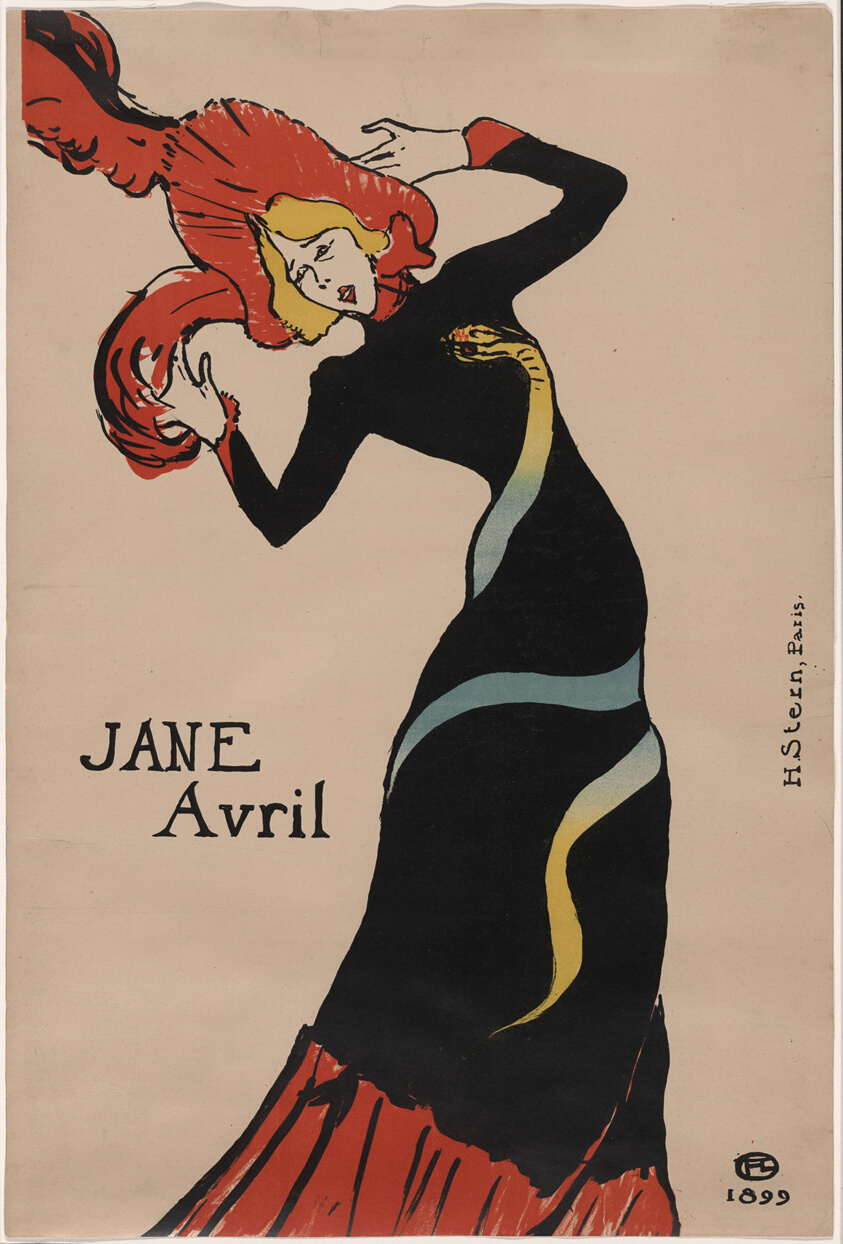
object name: Print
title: Jane Avril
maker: Henri de Toulouse-Lautrec (French, 1864-1901)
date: 1899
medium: Color lithograph on tan wove paper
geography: France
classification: lithograph; print; prints and drawing; poster